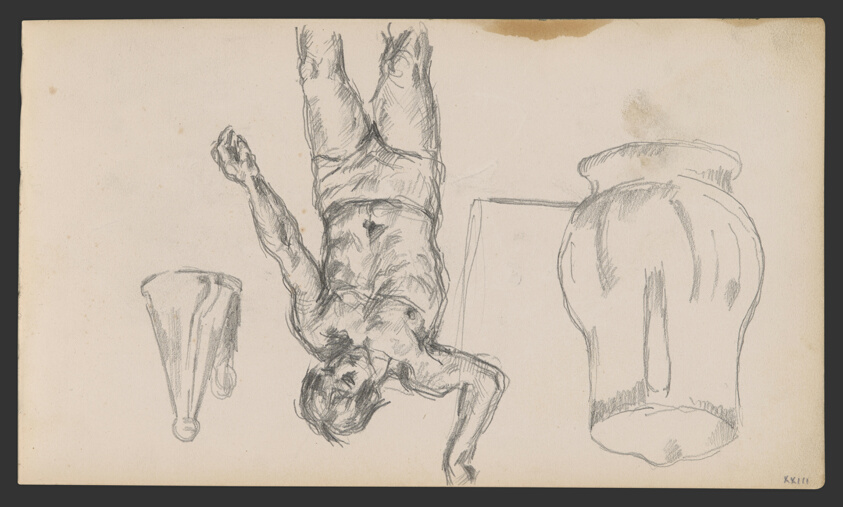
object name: Drawing and Watercolor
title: Sketchbook No. 2 (L'Estaque)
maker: Paul Cézanne; French, 1839-1906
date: 1875–86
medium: Graphite and pen and ink drawings on paper, bound into a book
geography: France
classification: sketchbook; graphite; prints and drawing; paper